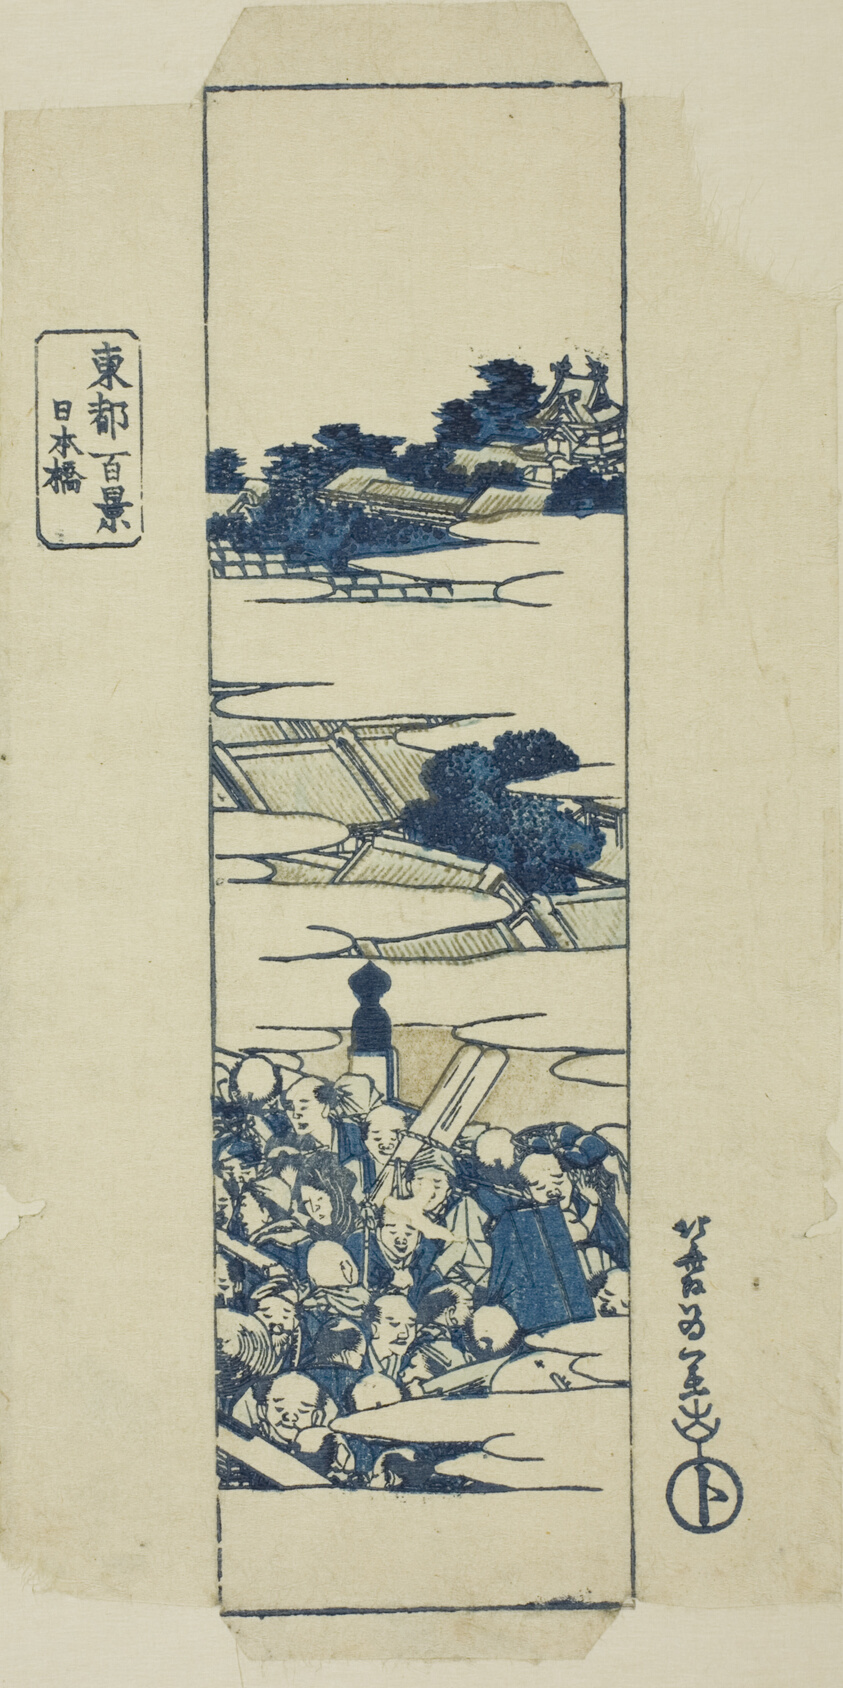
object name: Print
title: Nihonbashi Bridge, wrapper for the series "One Hundred Views of the Eastern Capital (Toto hyakkei)"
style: Japanese (culture or style)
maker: Katsushika Hokusai 葛飾 北斎; Japanese, 1760-1849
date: early 1830s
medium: Color woodblock print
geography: Japan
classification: woodblock print; print; asian art